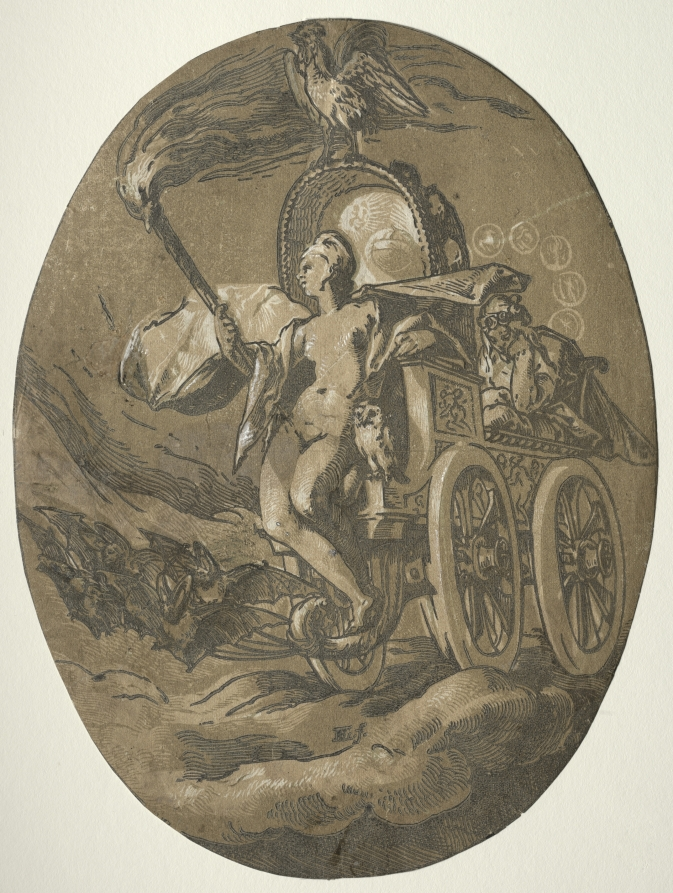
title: The Deities: Nox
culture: Netherlands, Haarlem, late 16th-early 17th century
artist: Hendrick Goltzius (Dutch, 1558–1617)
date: 1588–90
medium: chiaroscuro woodcut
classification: Print